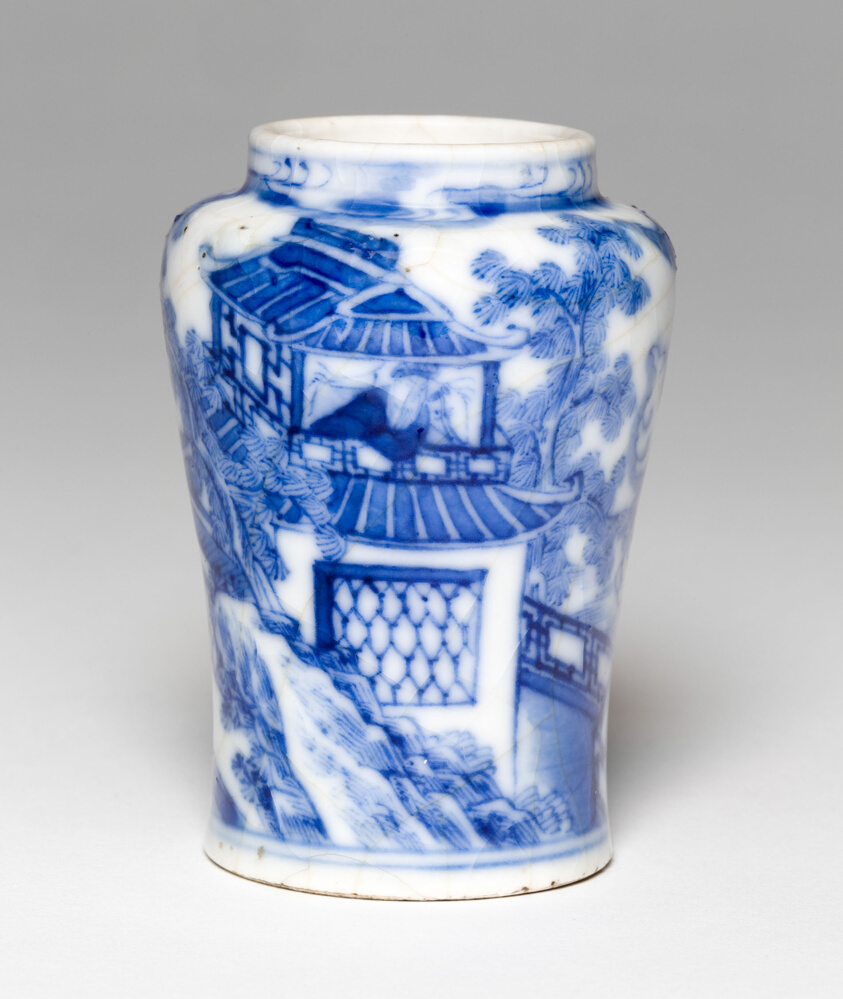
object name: Vessel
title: Miniature Vase with Scholar in Garden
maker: China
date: Qing dynasty (1644–1911), Yongzheng reign mark and period (1723–1735)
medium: Porcelain painted in underglaze blue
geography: China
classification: porcelain; ceramics; asian art